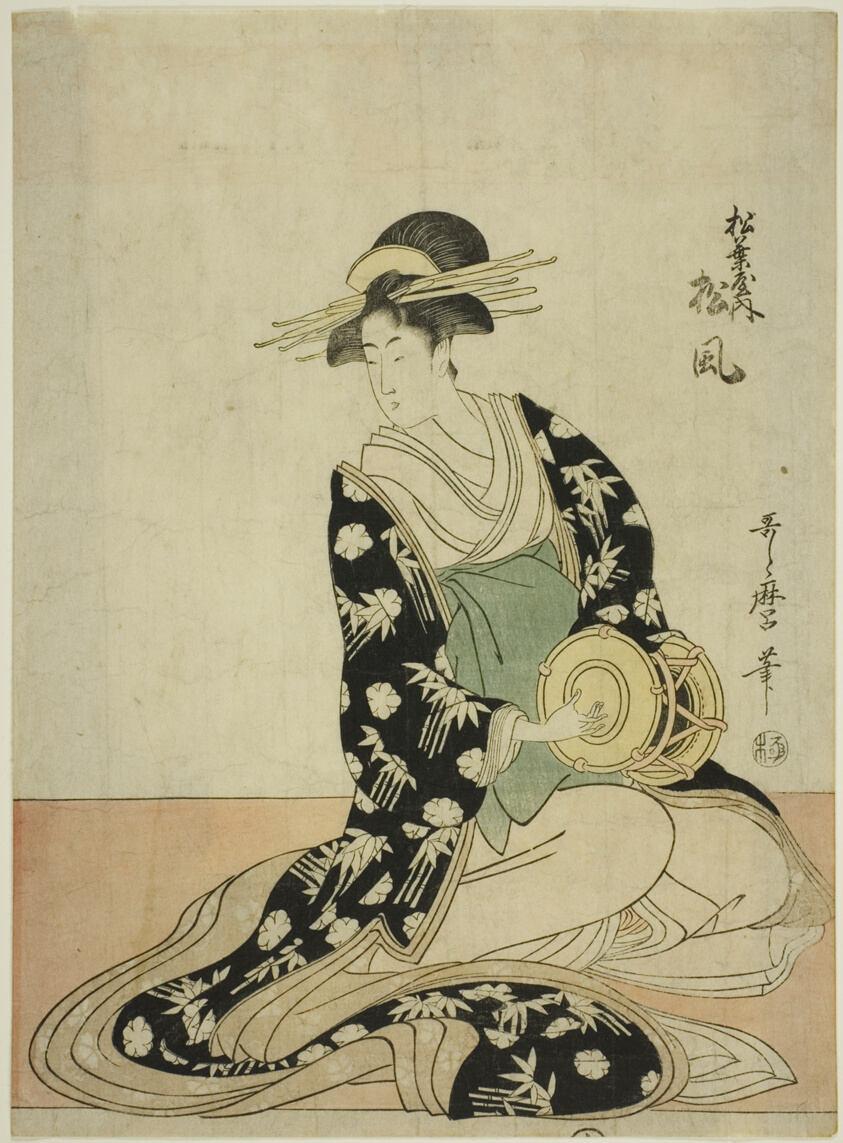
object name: Print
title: The Courtesan Matsukaze of the Matsubaya, from an untitled series of courtesans of the Matsubaya as five musicians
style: Japanese (culture or style)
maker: Kitagawa Utamaro 喜多川 歌麿; Japanese, 1753 (?)-1806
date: c. 1797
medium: Color woodblock print; oban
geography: Japan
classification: print; asian art